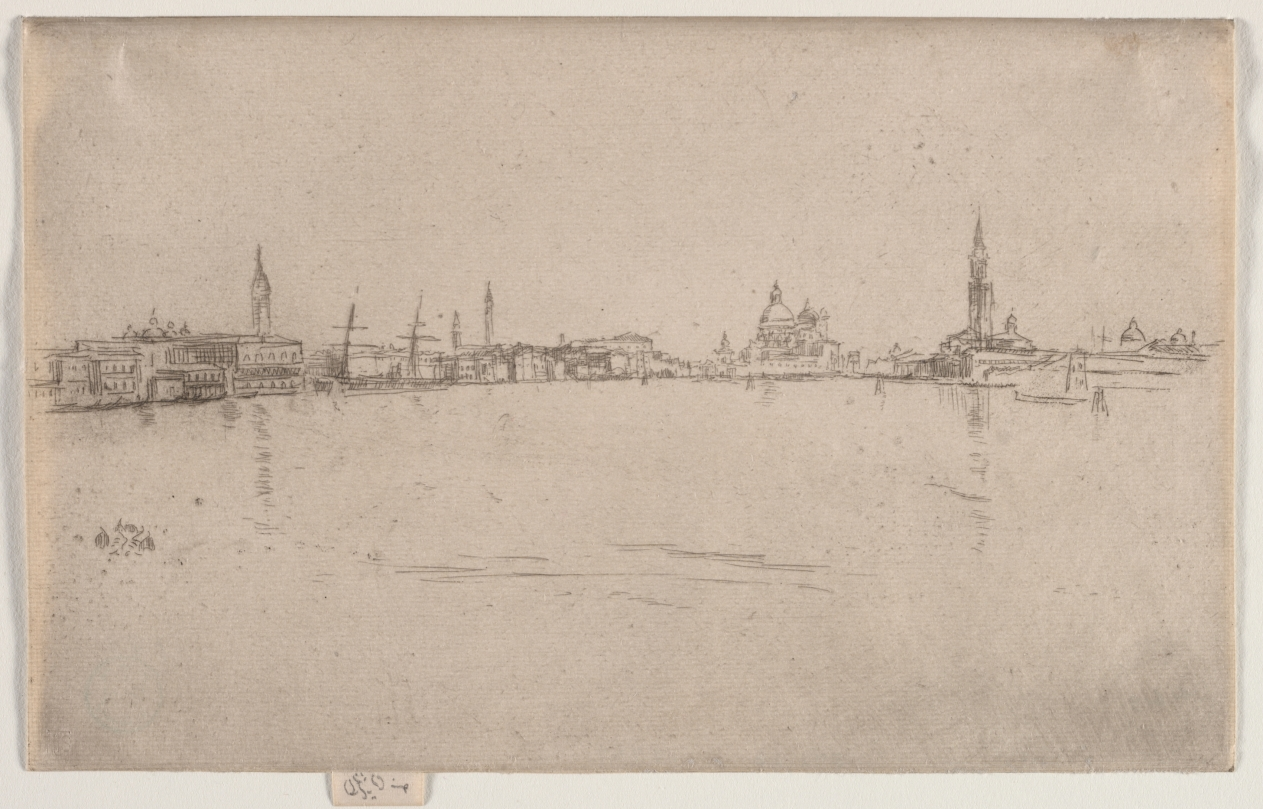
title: La Salute: Dawn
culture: America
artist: James McNeill Whistler (American, 1834–1903)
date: c. 1880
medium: etching and drypoint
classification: Print